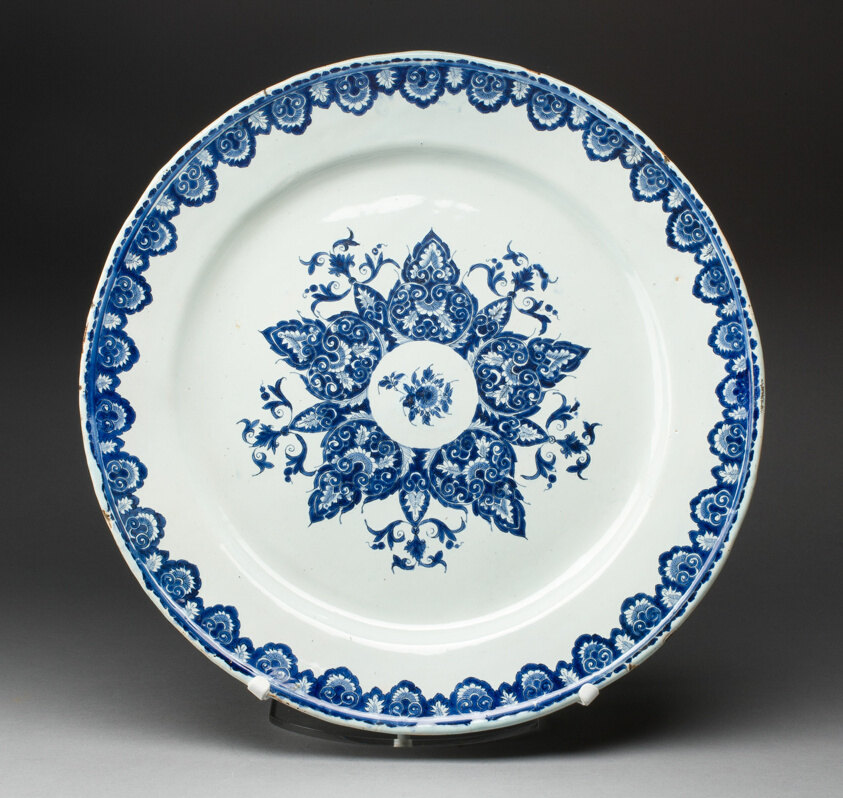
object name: Ceramics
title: Platter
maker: France, Rouen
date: c. 1700/20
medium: Tin-glazed earthenware (faience)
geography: Rouen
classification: vessel for serving food; dish (vessel); tin-glazed ware; earthenware; european decorative arts; ceramics